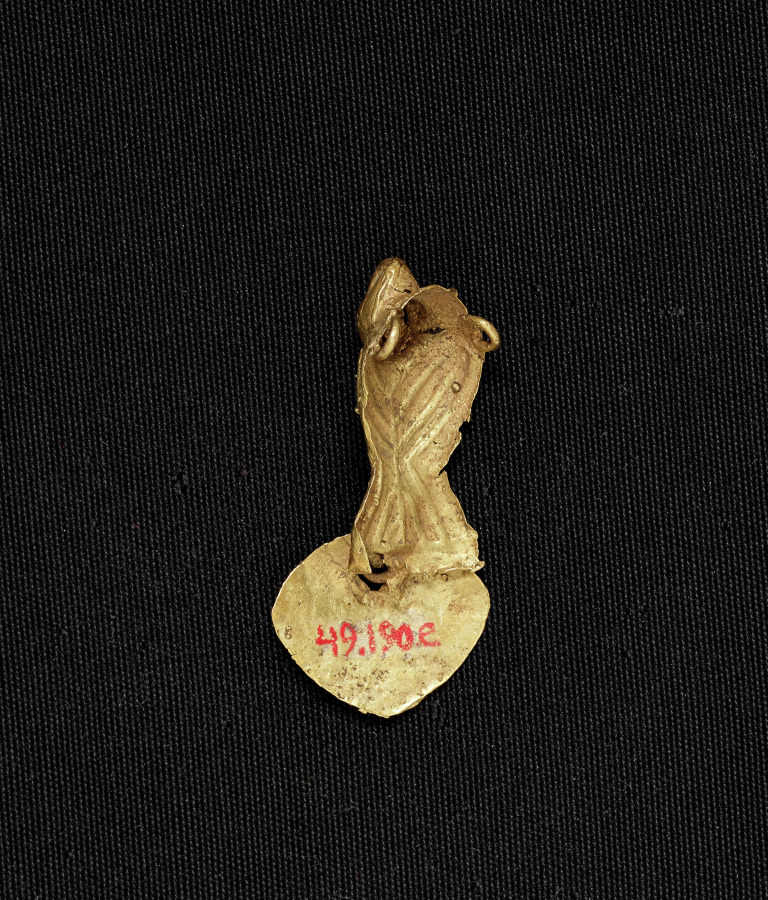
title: Bird Bead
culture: Colombia, Muisca style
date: c. 900–1550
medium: cast gold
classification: Jewelry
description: Muisca metalwork divides into two categories: ornaments to be worn, such as these, and offering figurines, in the case to the right. The elaborate bird pendant features delicate herringbone moldings, openwork patterns, and wing details-all part of the wax model from which the pendant was cast (see nearby computer animation). The dangles were attached after casting.